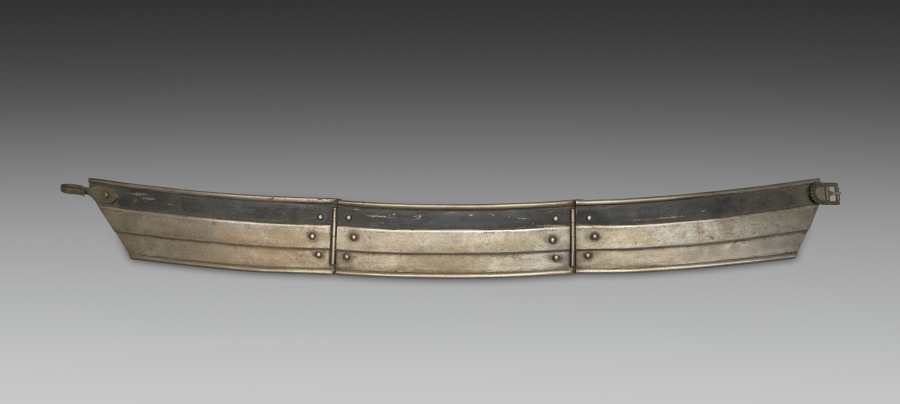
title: Armored Horse's Rein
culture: Germany, 19th century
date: 1801–1900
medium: steel with black paint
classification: Arms and Armor